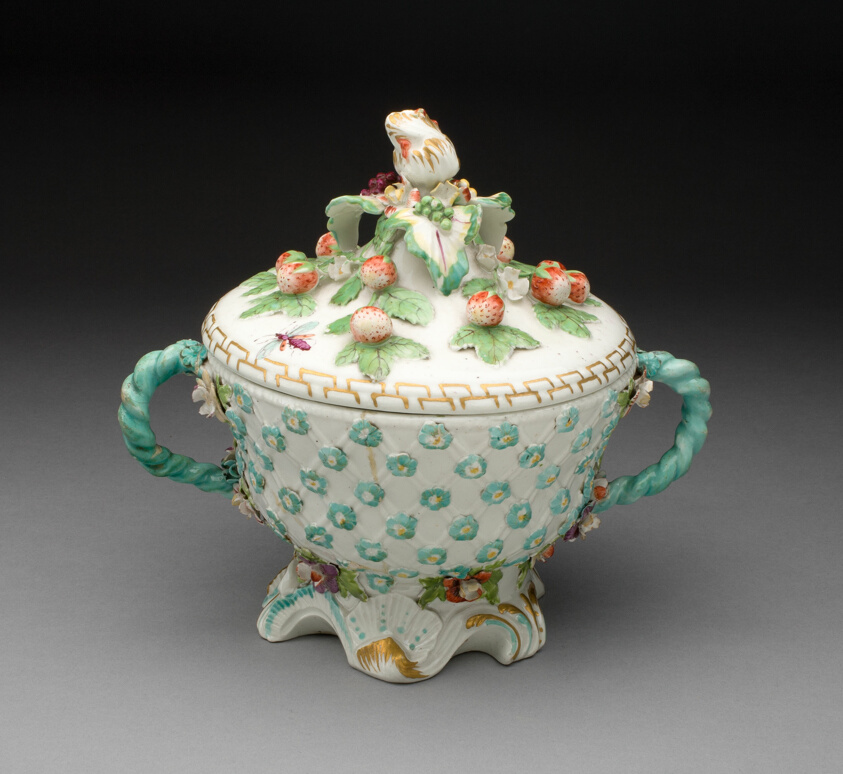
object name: Ceramics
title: Covered Bowl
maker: Chelsea Porcelain Manufactory; London, England, c. 1745-1784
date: 1750/60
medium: Soft-paste porcelain, polychrome enamels and gilding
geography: Chelsea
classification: bowl; dish (vessel); ceramics; porcelain; european decorative arts